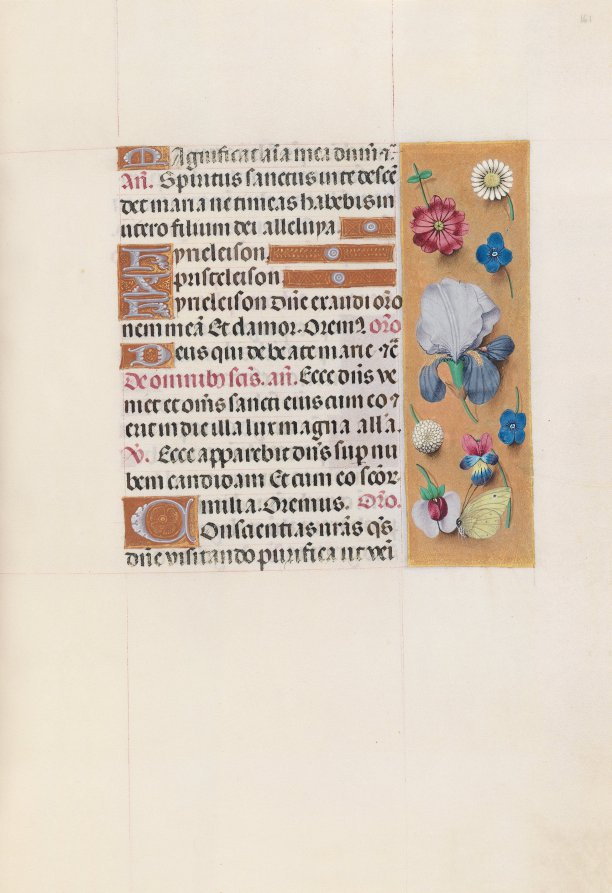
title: Hours of Queen Isabella the Catholic, Queen of Spain: Fol. 161r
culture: Flanders, Ghent and Bruges, late 15th century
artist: Master of the First Prayerbook of Maximillian (Flemish, c. 1444–1519)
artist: and Associates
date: c. 1500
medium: ink, tempera, and gold on vellum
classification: Bound Volume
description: This manuscript was illuminated by a circle of at least five highly organized manuscript painters active in the Flemish cities of Ghent and Bruges. The principal illuminator was Alexander Bening, who painted the majority of the book's miniatures. Manuscripts produced by this circle of artists are renowned for the decoration of their borders, which typically feature a rich variety of realistically-painted flowers, birds, and butterflies. This prayer book, called a book of hours, was intended not for a cleric, but for the private devotions of a lay person-in this case, Isabella the Catholic, Queen of Spain (1451-1504). Isabella's coat of arms embellishes the book's frontispiece. It is unlikely that the book was commissioned by the Queen herself; rather, she probably received it as a diplomatic gift from someone courting her patronage, perhaps Cardinal Francisco Jimenez de Cisneros. A Franciscan friar, Jimenez was dependent upon Isabella for his advancement, first to the post of Queen's confessor in 1492, and then to Archbishop of Toledo in 1495.